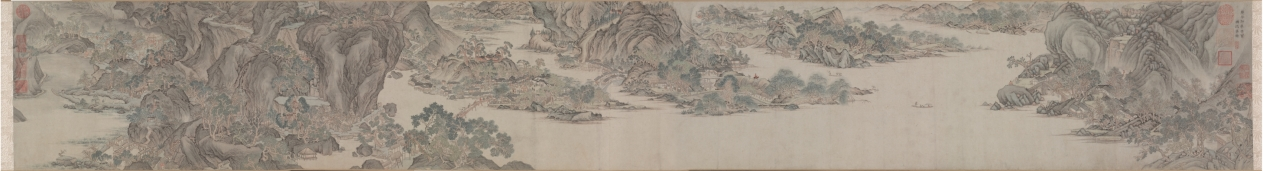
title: Greeting the Spring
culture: China, Ming dynasty (1368–1644)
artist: Wu Bin (Chinese, active c. 1591–1626)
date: 1600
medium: handscroll; ink and light color on paper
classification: Painting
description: This masterfully composed landscape in light colors and delicate brushwork is an image of the water-rich Jiangnan region in southeast China, where Wu Bin was active as an artist. Embedded in rolling hills along lakesides and streams nestle cityscapes hosting numerous spring festivities. Lantern displays and street performances in the villages salute the New Year, and are interwoven with scenes of farming, fishing, and silk making. In one scene in the middle ground, an ox made of clay under a canopy is lead in a procession to an architectural compound, a ceremony known as whipping the spring ox in hope for a good harvest. This handscroll bears five collector seals by the Qianlong emperor indicating his appreciation for the painting.